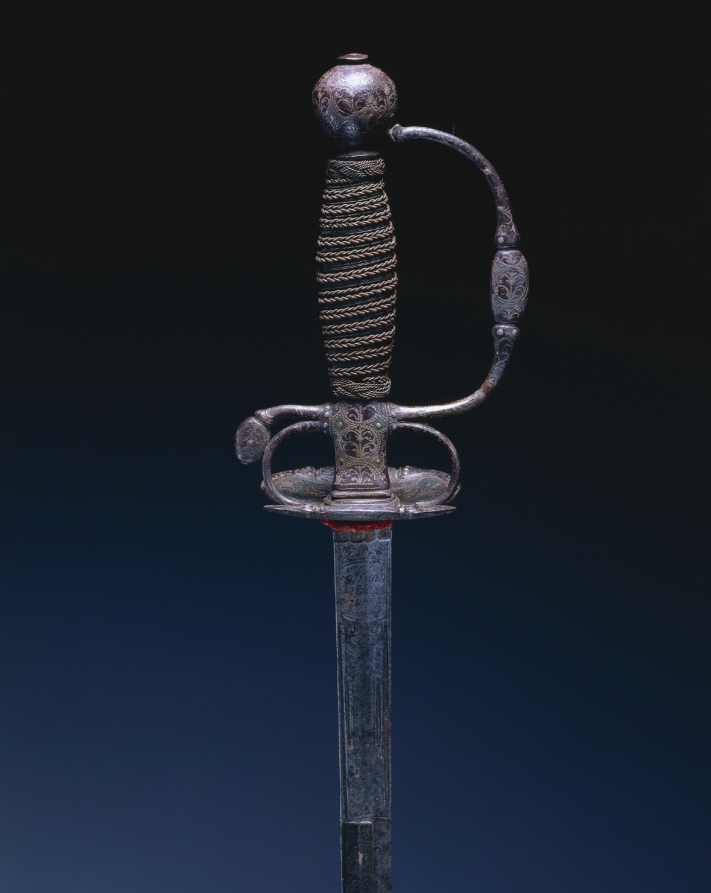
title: Small Sword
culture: Italy, 18th century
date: c. 1730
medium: steel, iron, copper wire, wood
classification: Arms and Armor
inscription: AMOR VINCIT OMNIA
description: During the 1700s, the small-sword emerged as a light, quick weapon. Like the rapier it was carried by unarmored civilians, the noblemen of the upper classes. Over time this delicate sword became more an accessory of male attire than a weapon essential to life and death. The sword hilt, which shows even when the blade is sheathed, became the ground for elaborate decoration. These small-swords thus represent the final stage in the evolution of the sword, from the edged weapons of antiquity to the elegantly refined blades of the 1700s and 1800s.